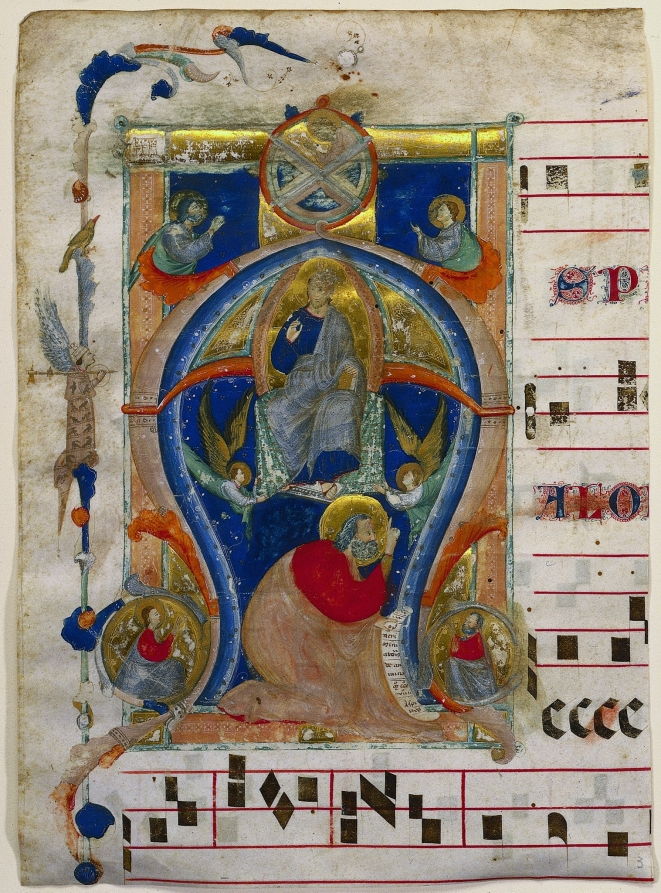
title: Fragment of an Antiphonary with Historiated Initial (A): Christ in Majesty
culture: Italy, Rimini, 14th century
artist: Neri da Rimini (Italian)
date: 1308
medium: ink, tempera, and gold on parchment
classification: Manuscript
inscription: Signed and dated: "1308"